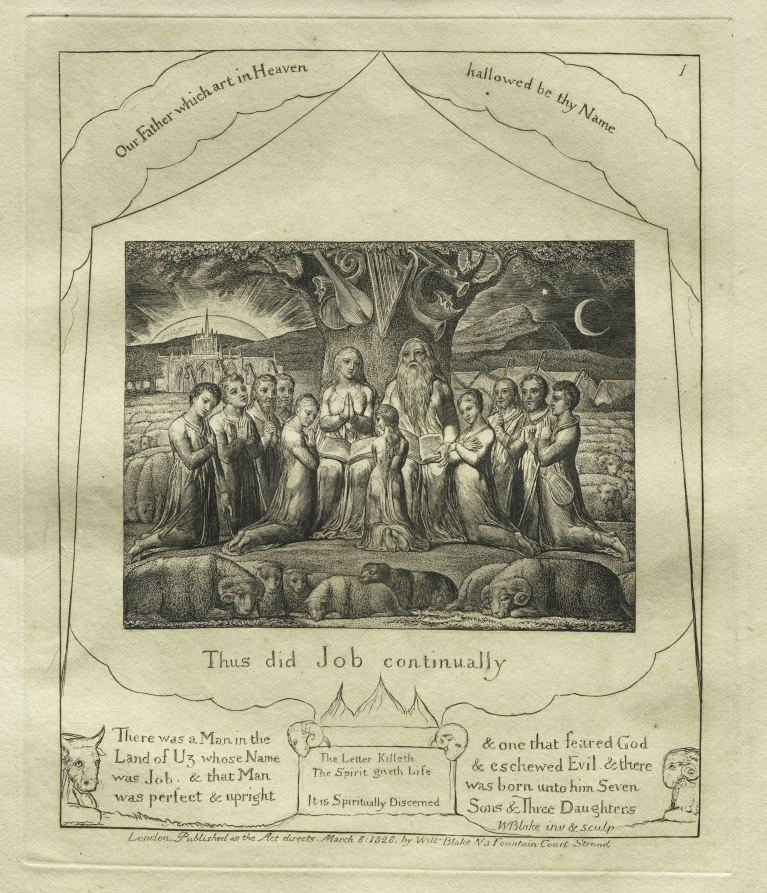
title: The Book of Job: Pl. 1, Thus did Job continually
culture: England, 19th century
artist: William Blake (British, 1757–1827)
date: 1825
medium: engraving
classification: Print